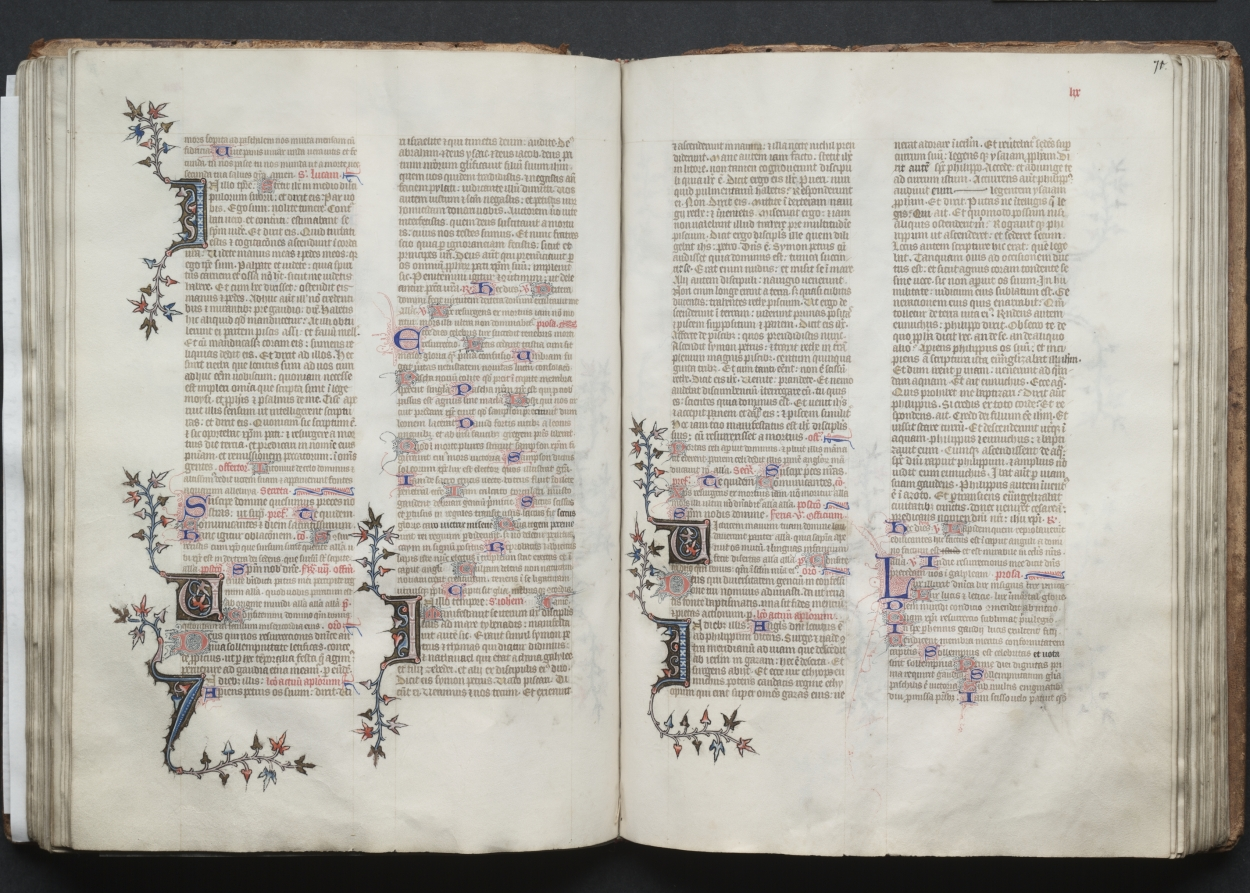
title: The Gotha Missal: Fol. 70v, Text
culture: France, Paris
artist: Master of the Boqueteaux (French)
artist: and Workshop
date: c. 1375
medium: ink, tempera, and gold on vellum; blind-tooled leather binding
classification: Bound Volume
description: The style and quality of this manuscript's decoration is typical of deluxe Parisian books made for aristocratic or royal patrons. Most of the book's decoration appears to be the work of the Master of the Boqueteaux, an artist active at the court of King Charles V (died 1380). His style was apparently shared by a number of book illuminators working in and around Paris. It is very possible that the Gotha Missal belonged to Charles V, but is not provable because the manuscript has no royal portraits and lacks a colophon. Given the book's magnificent decoration, however, it would seem that it was produced for a Valois prince, if not for the king himself. The manuscript receives its name from the German dukes of Gotha, its later owners.